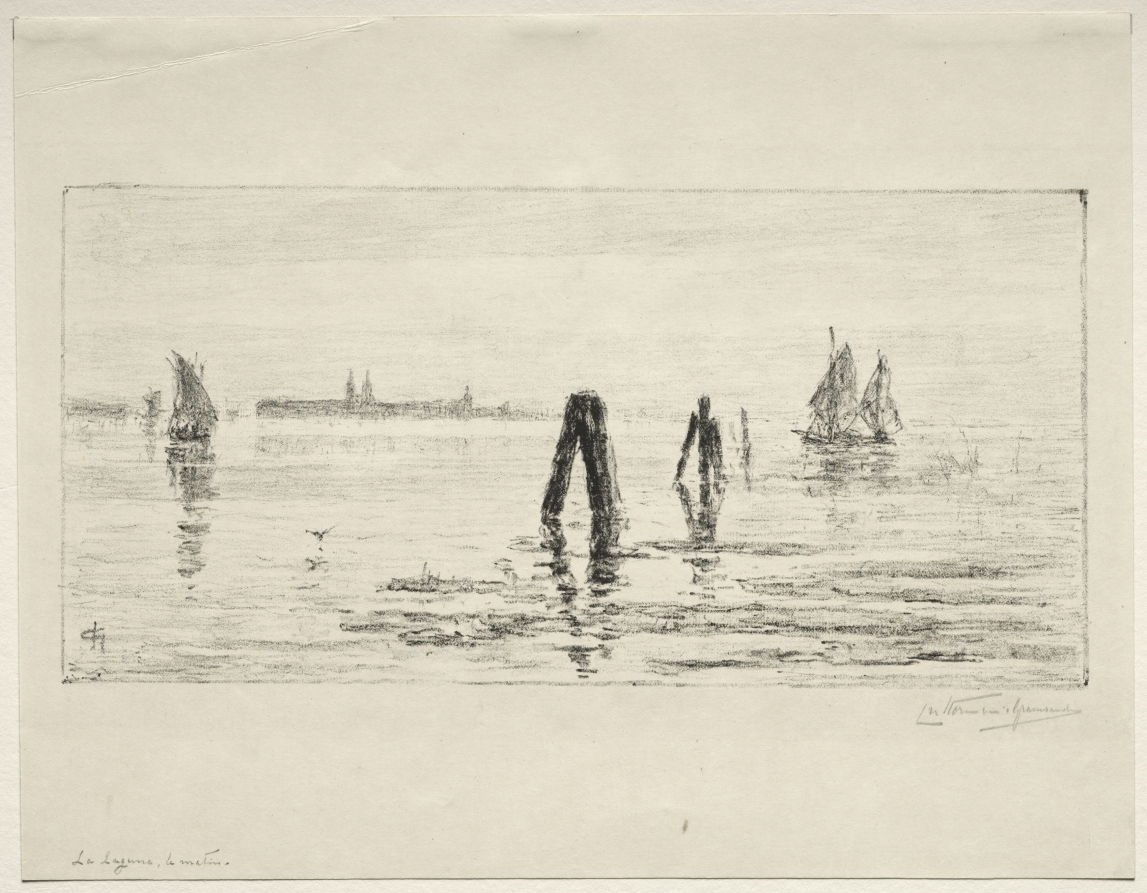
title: Lagoon, Morning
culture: Netherlands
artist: Charles Nicolas Storm van 's-Gravesande (Dutch, 1841–1924)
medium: lithograph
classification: Print